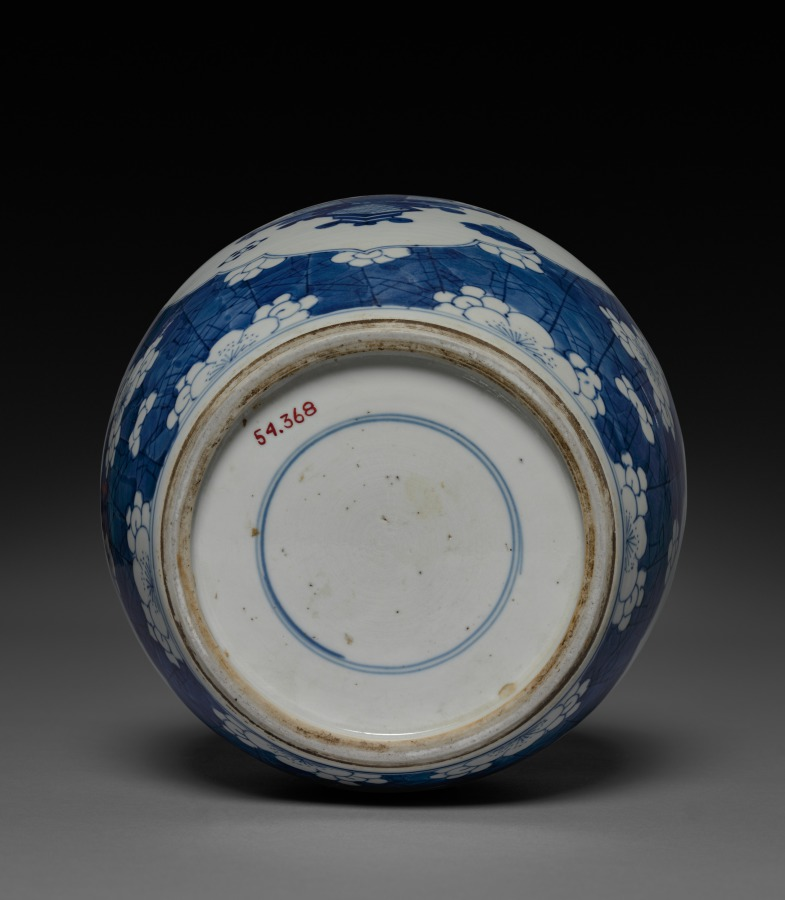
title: Ginger Jar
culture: China, Qing dynasty (1644-1911), Kangxi reign (1662-1722)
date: 1662–1722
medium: porcelain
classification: Ceramic